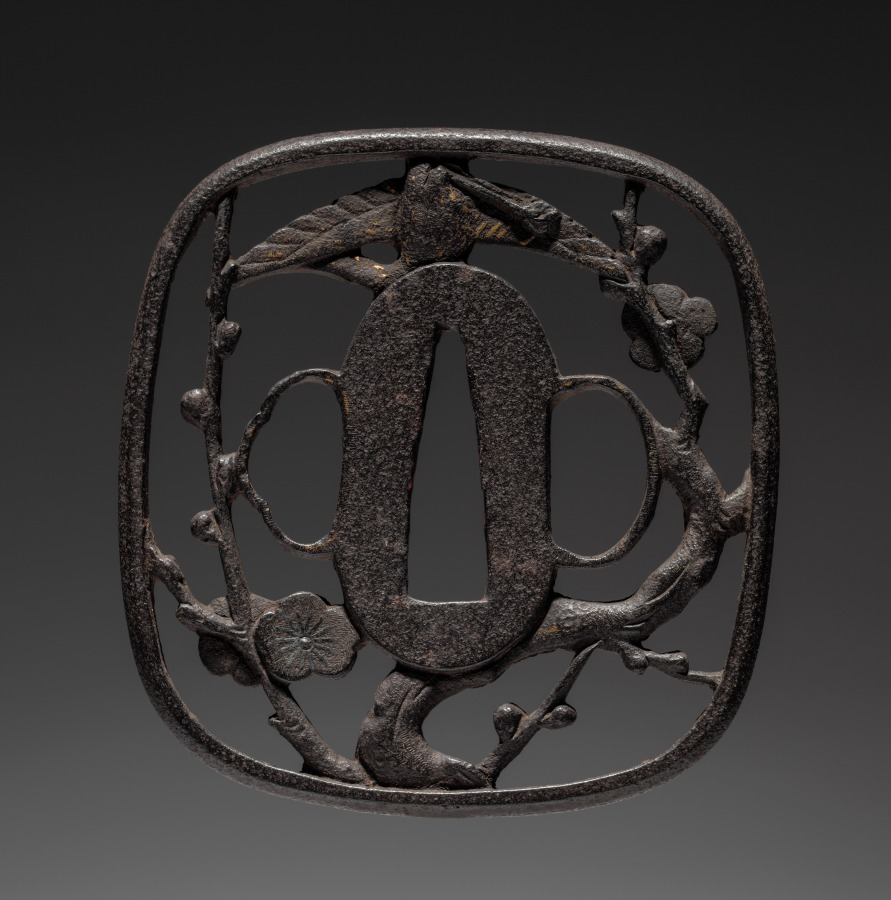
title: Sword Guard (Tsuba) with Crane and Plum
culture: Japan, possibly Edo period (1615-1868)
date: c. 1615–1868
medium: iron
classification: Arms and Armor